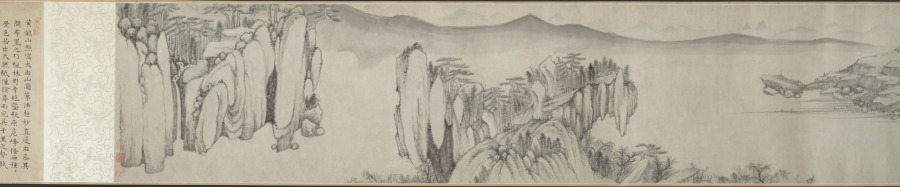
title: Mt. Taibo in the Style of Wang Meng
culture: China, Ming dynasty (1368–1644)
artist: Du Qiong (Chinese, 1396–1474)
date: 1442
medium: handscroll; ink and light color on paper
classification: Painting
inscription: Artist's inscription, signature, and 11 seals: [1 seal] Tung-yüan chai. Huang-ho-shan-ch'iao [Wang Meng] painted a painted called T'ai-po Mountain. Its brushwork is superior and admirable, which is very close to Yu-ch'en [Wang Wei, 699-759]. The cleverness of its composition, the maple groves and rustic temples, the inaccessible ravines and autumnal plateaus, the periolous peaks and strange rocks, etc., all seem to be so natural. The paper is only a little over eight feet, but the landscape has the range of a thousand miles. Once you open and note the contents, it is as if one were roaming among the mountain peaks enveloped in mist and clouds, and forgot the dusty world. When I first saw this, I was so mixed with excitement and joy that I could not take my hands off the painting. So I put it on the table, and tried my best to imitate it, forgetting sleeping and eating for about three months before it was completed. Although I do not dare to tread in the footsteps of Huang-ho shan ch'iao, I took great pains to capture his spirit in composition and colors. I do not know whether it would pass the judgment of the experts. On the fifteenth day of the fifth month, the seventh year of the Cheng-t'ung year [1442], inscribed by Tung-yüan, Tu Chiung. [2 seals] Yung-chia; Ching-chieh ming-men. [8 seals on painting] Tung-yüan chai; Ching-chieh ming-men; Yung-chia; Tu Ch'iung yin; Tung-yüan (repeated 5 times). trans. WKH/LYSL 3 colophons and 7 additional seals: 1 colophon and 2 seals of Chou Ting (1401-1487); 1 colophon and 2 seals of Wu K'uan (1435-1504); 1 colophon, dated 1655, and 2 seals of Lan Ying (1585-after 1664).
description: When a Chinese painter "imitated" a painting by a past master, the intention was never to produce an exact copy. Du Qiong, the Ming painter from Suzhou, is a case in point. The painting style of this handscroll is actually closer to that of Huang Gongwang (1269–1354) than to the style of Wang Meng (about 1301–1385). Both masters were active during the previous dynasty and are among the so-called Four Great Masters of the Yuan dynasty (1279–1368). In this painting, the interplay of styles, including Du Qiong's own, contribute to an inner dimension that is more than visual. Mt. Taibo is located in the province of Zhejiang and is known for its scenic beauty. In this scroll, however, it is not depicted literally. The image is an ideal representation of mountains in southeastern China.